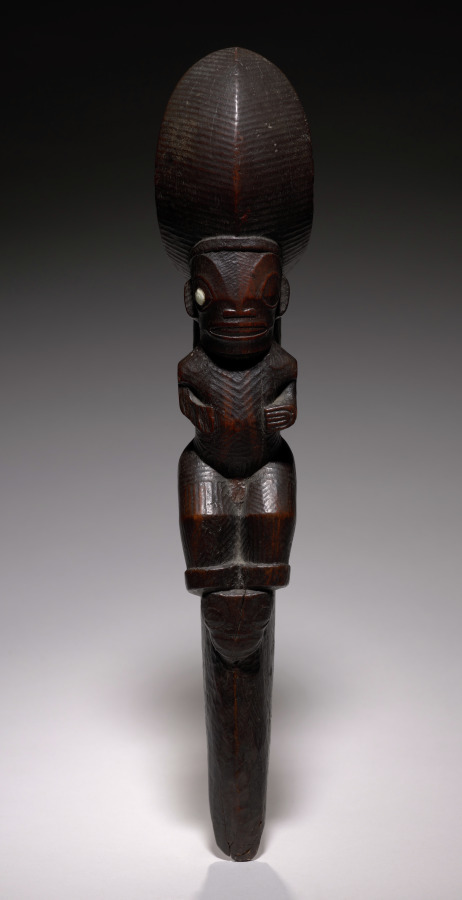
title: Stilt Footrest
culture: Polynesia, Marquesas Islands, 19th century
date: early 1800s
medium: wood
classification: Sculpture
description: Stilt walking and knockdown stilt contests were favorite forms of amusement and competition on the Marquesas Islands. The decorated footrest was secured to a six-foot stilt pole by wrapping sennit fiber cord through a wide slit at the carved figure's back and around the pointed end. Champion stilt walkers competed with those from other tribes during great festivals. Special artists carved the footrests from hardwood and cured them in the mud of a taro patch.